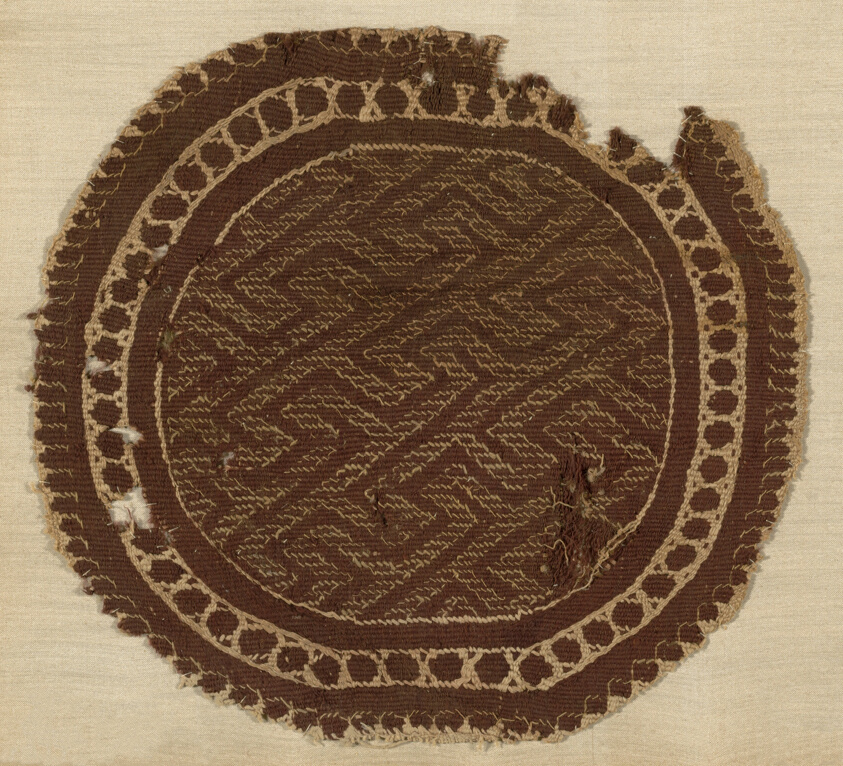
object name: Textile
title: Roundel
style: roman period (egyptian)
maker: Coptic (Egypt)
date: Roman period (30 B.C.– 641 A.D.), 3rd/5th century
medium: Linen and wool, tapestry weave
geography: Egypt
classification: textile; weaving